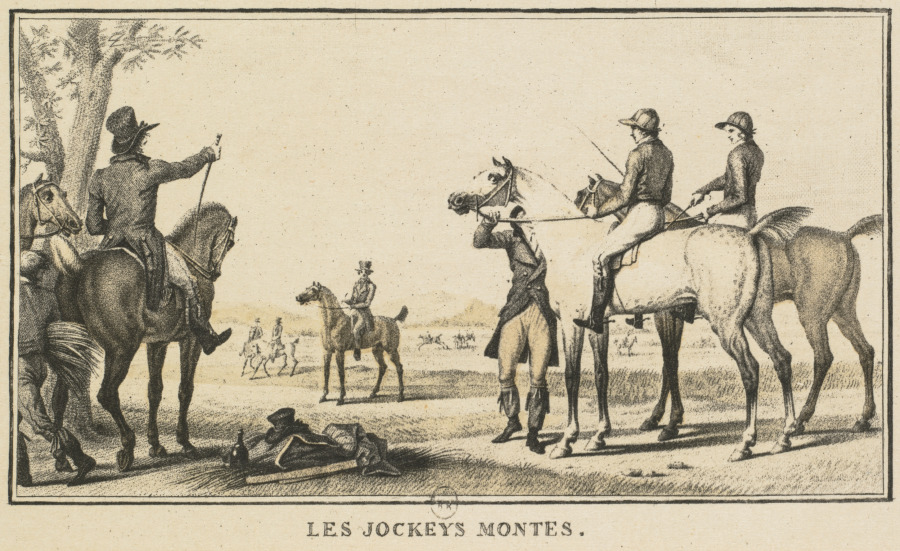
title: Racing Scenes: The Jockey Mounting the Horse (Scènes Hippiques: Le jockey montant a cheval)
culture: France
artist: Carle Vernet (French, 1758–1836)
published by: Jazet and Aumont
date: c. 1780–1836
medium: lithograph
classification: Print